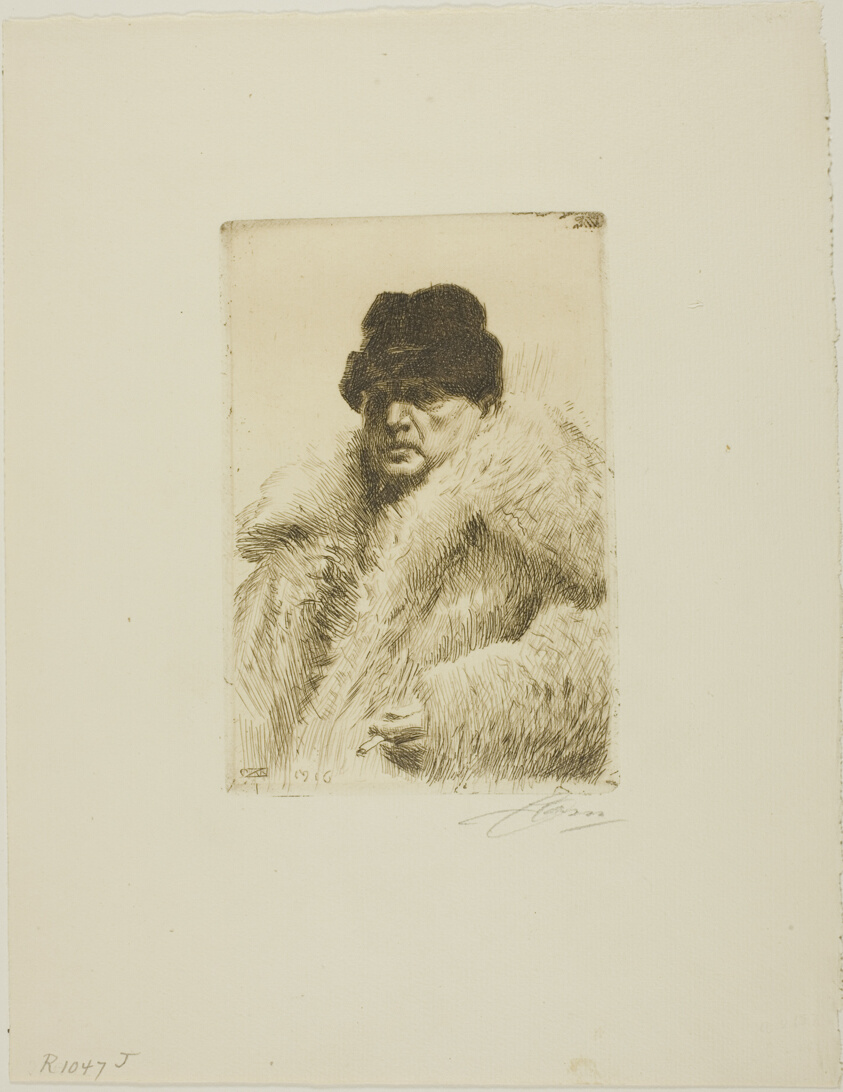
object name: Print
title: Self-Portrait 1916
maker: Anders Zorn (Swedish, 1860-1920)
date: 1916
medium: Etching on cream laid paper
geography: Sweden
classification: etching; print; prints and drawing